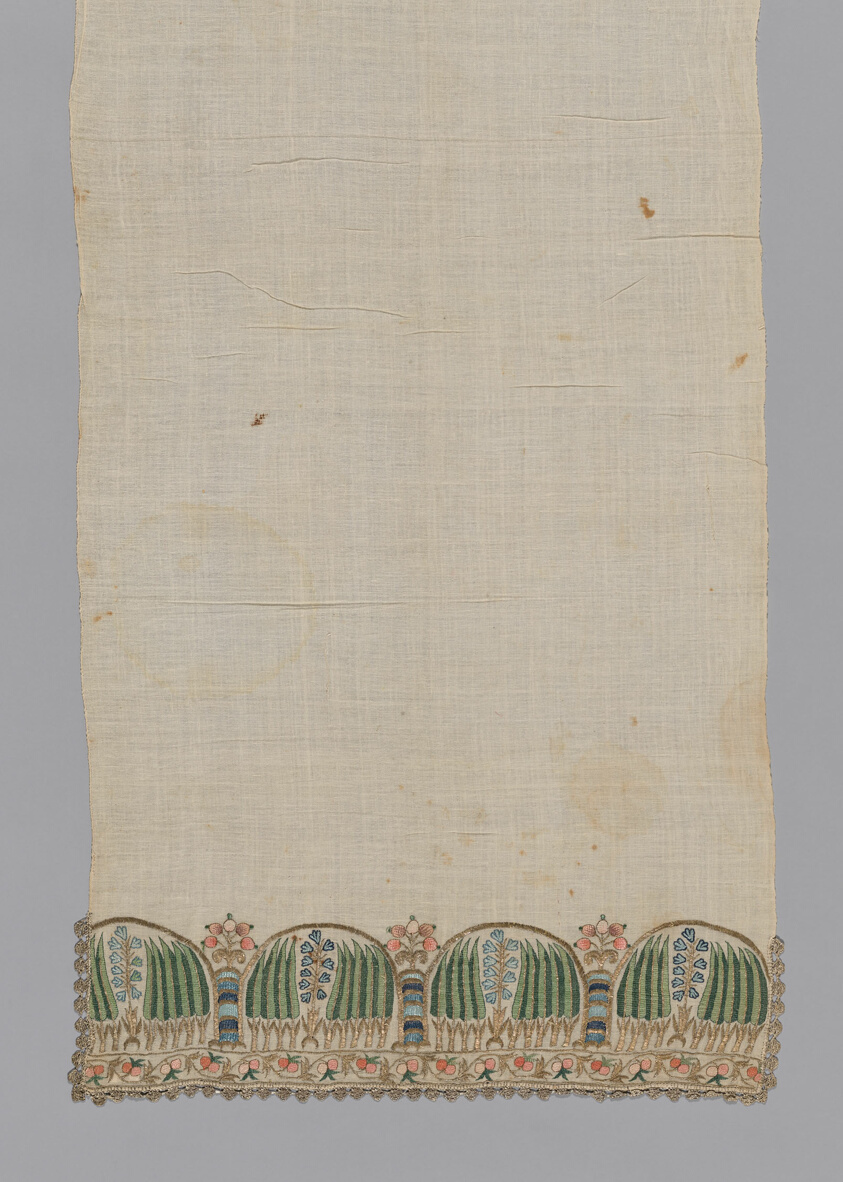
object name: Textile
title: Towel or Napkin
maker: Turkey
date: 19th century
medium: Embroidered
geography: Turkey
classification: textile; weaving; needlework (visual works)